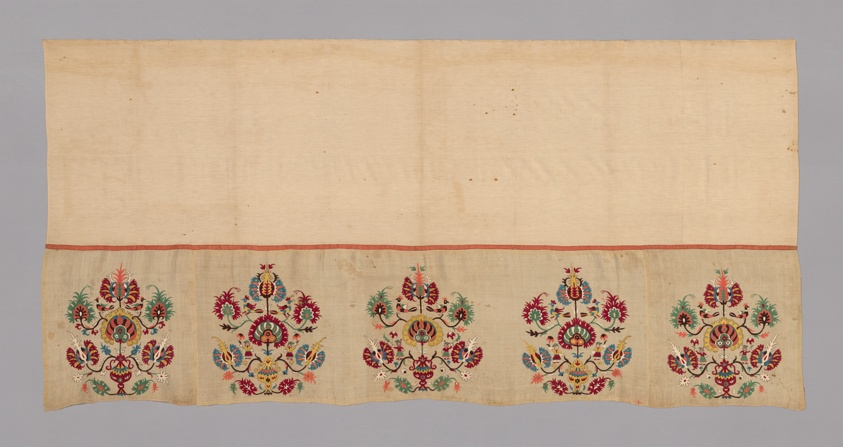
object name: Textile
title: Bed Valance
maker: Greece, Northern Sporades Islands, Skíros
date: 18th century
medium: Upper portion: cotton, plain weave; center band: silk, plain weave; lower portion: linen, plain weave; embroidered with silk in back, double running, running (pattern darning), satin, split, and stem stitches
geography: Skíros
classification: textile; needlework (visual works)